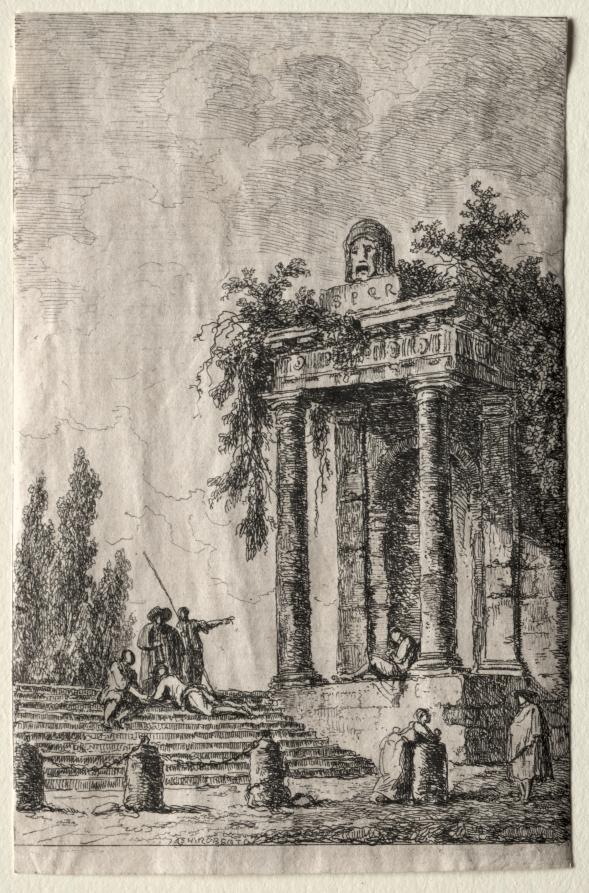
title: Les Soirées de Rome: The Stairs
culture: France, 18th century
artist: Hubert Robert (French, 1733–1808)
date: 1763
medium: etching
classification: Print